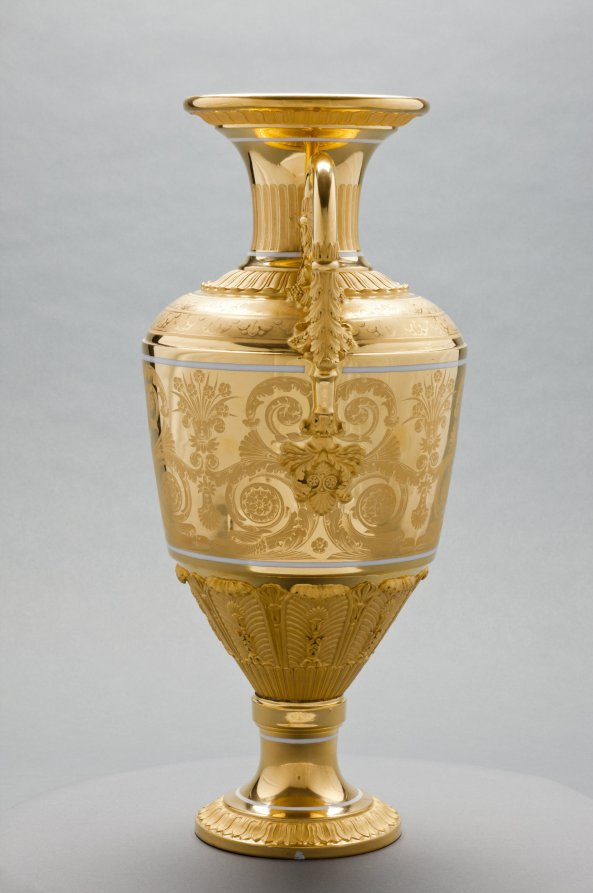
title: Vase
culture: Russia, St. Petersburg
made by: St. Petersburg Imperial Porcelain Factory (Russian)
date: c. 1820–1830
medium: gilt porcelain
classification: Ceramic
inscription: inscribed: "Moreau" in gold near lip.